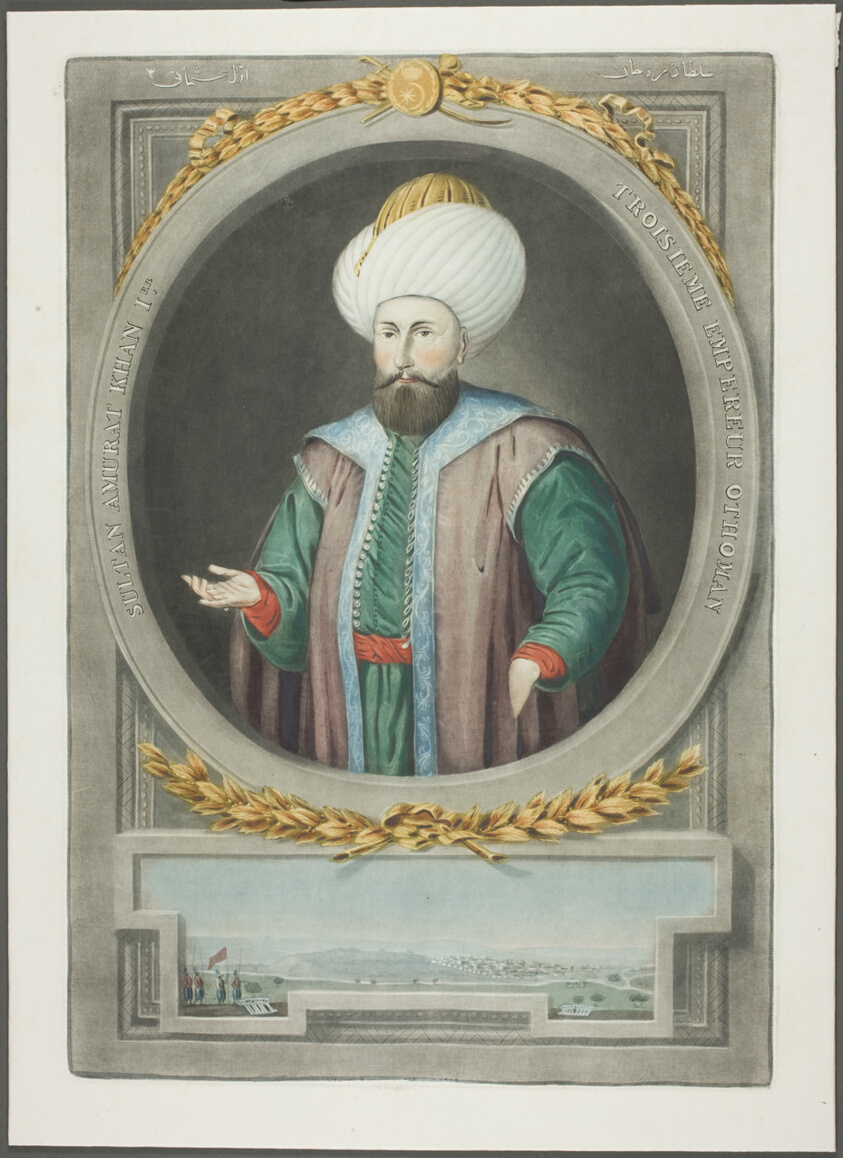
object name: Print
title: Amurat Kahn I, from Portraits of the Emperors of Turkey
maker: John Young (English, 1755-1825)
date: 1815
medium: Mezzotint, hand-colored with brush and watercolor, on ivory wove paper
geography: England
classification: mezzotint; print; prints and drawing